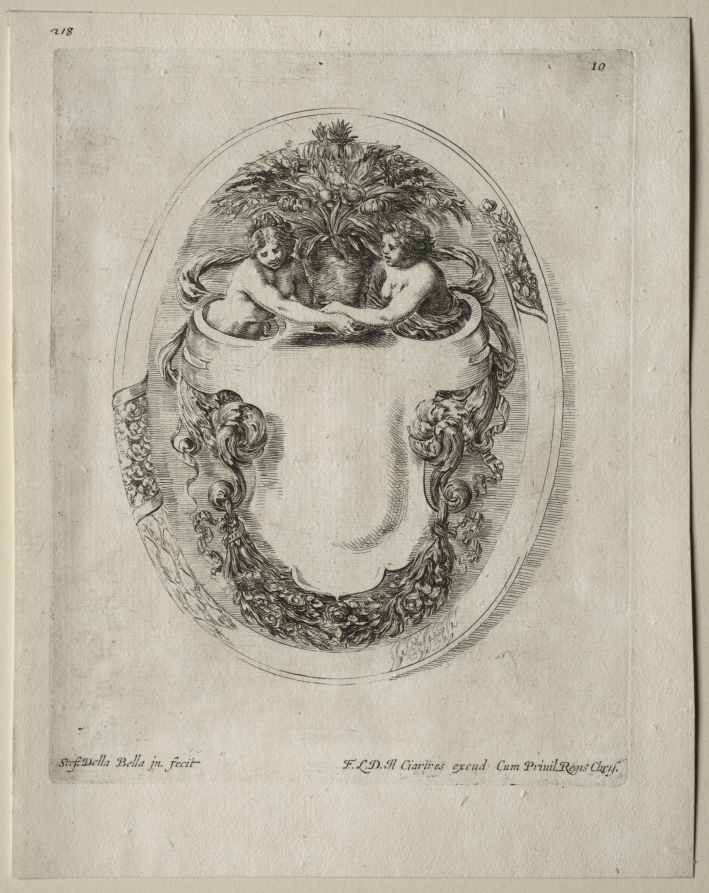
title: Collection of Various Caprices and New Designs of Cartouches and Ornaments: No 10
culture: Italy, 17th century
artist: Stefano Della Bella (Italian, 1610–1664)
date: 1646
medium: etching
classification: Print